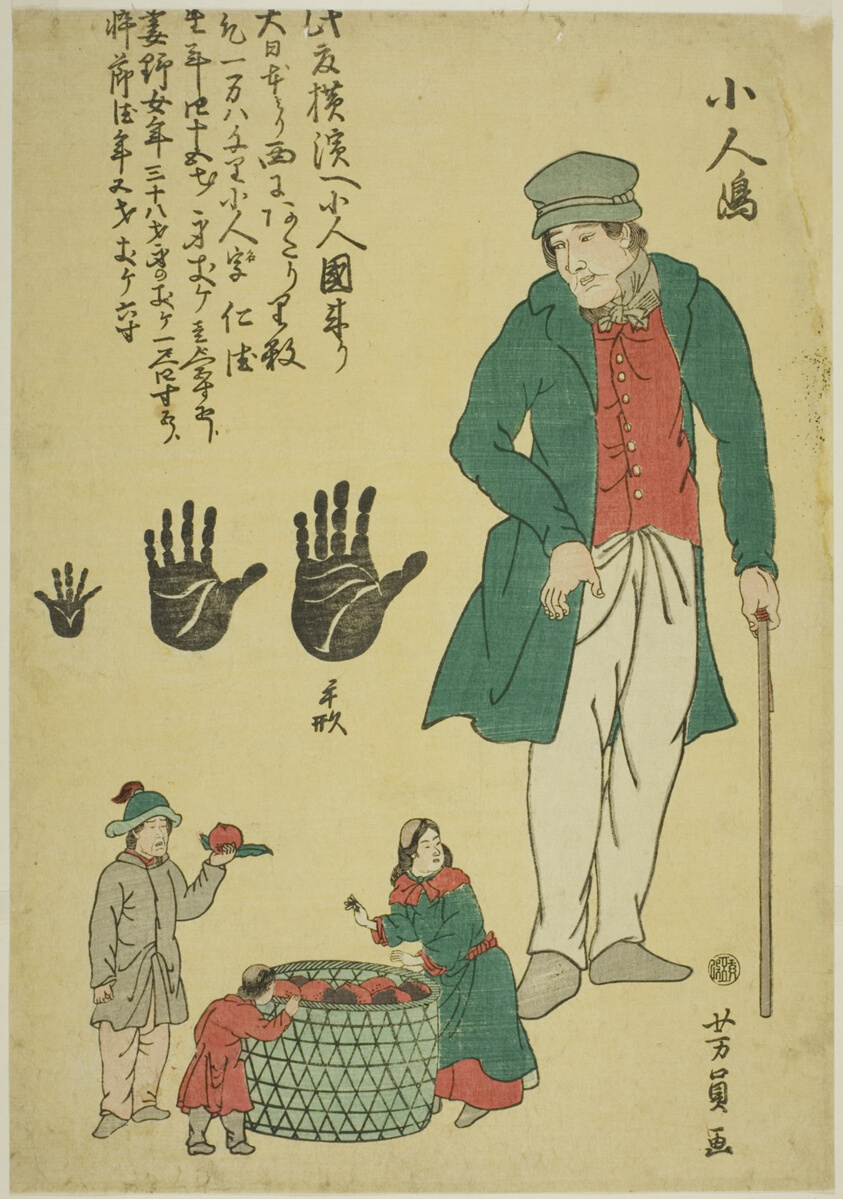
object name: Print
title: Island of Little People (Kobitojima)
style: Japanese (culture or style)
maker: Utagawa Yoshikazu (Japanese, active c. 1850-70)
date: 1863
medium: Color woodblock print; oban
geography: Japan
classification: woodblock print; print; asian art